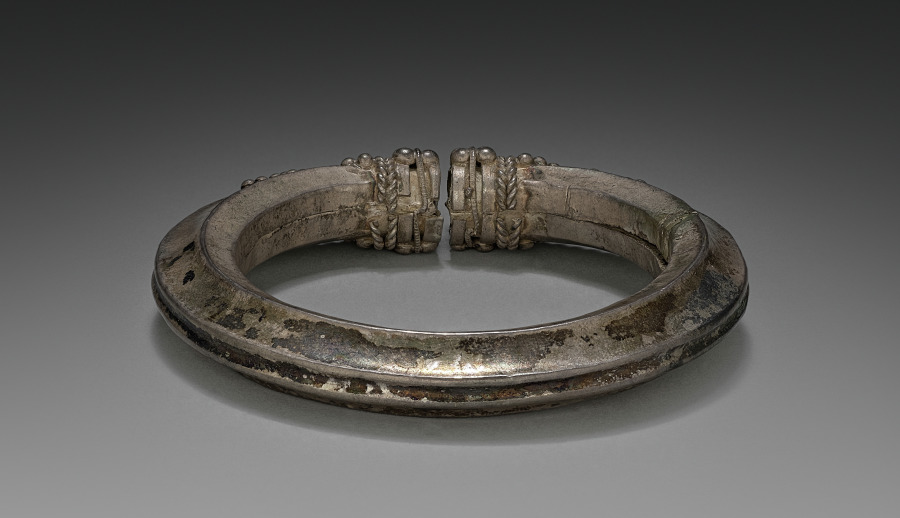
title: Bracelet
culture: India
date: early 1900s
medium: silver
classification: Jewelry